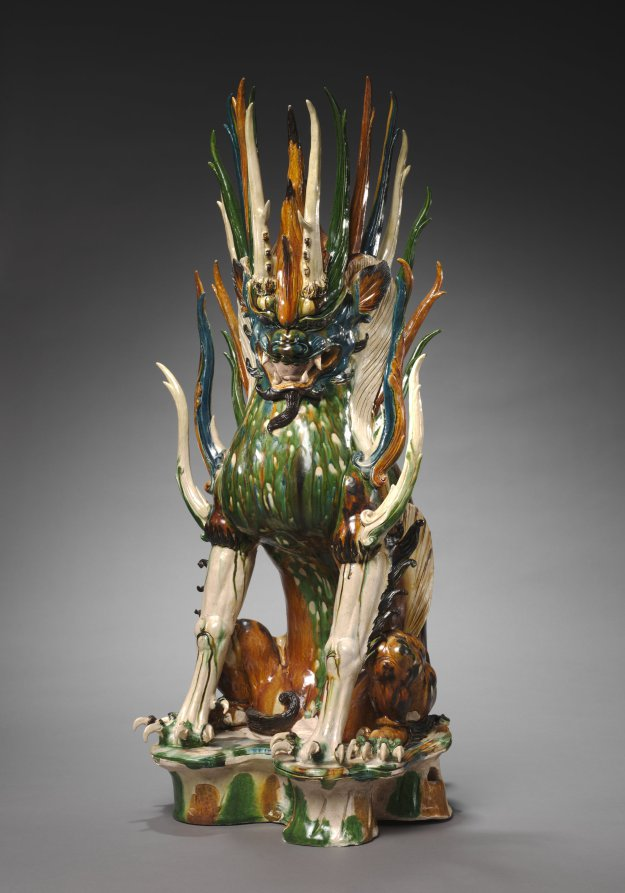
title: Tomb Guardian with Animal Head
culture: China, probably Shaanxi province, Xi'an, Tang dynasty (618-907)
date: early 700s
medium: glazed earthenware, sancai (three-color) ware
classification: Ceramic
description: With their fierce expressions and exaggerated physical features, fantastic guardian creatures were intended to guard the entrance to a tomb, warding off evil as well as keeping the soul of the deceased from wandering. Known as "earth spirits" or qitou, this one has an animal face and a pair of antlers growing above its eyebrows; the other sports a human face with huge protruding ears and a short horn surrounded by fiery, twisting hair. Their many elongated spikes heighten the fearful intensity. Before tomb sculptures were placed in the tomb, they were carried through the streets in a funerary procession. Funerary gifts provided the deceased with means for the afterlife. They were also an expression of filial piety and demonstrated the wealth and power of the descendants.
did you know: Sancai (three-color) glazes in green, amber, and transparent white, plus expensive cobalt blue glaze, show the high social status of the tomb’s occupant.